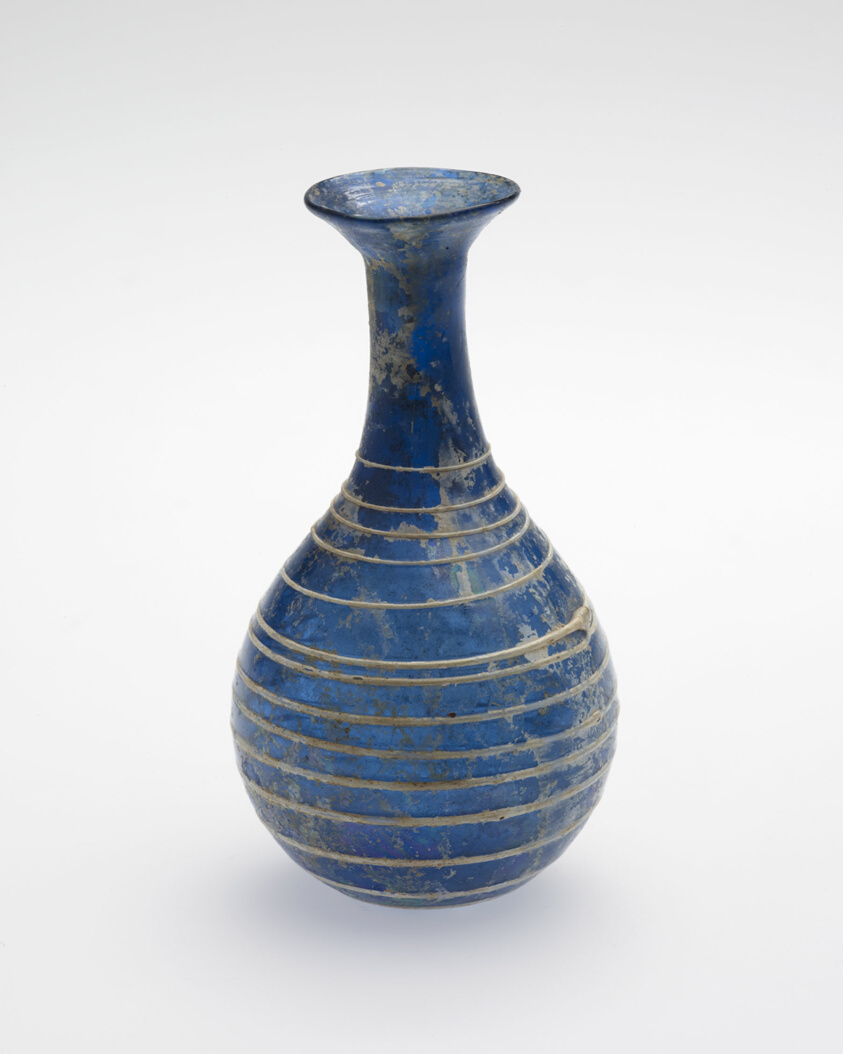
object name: Vessel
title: Bottle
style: roman (ancient, style or period), ancient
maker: Roman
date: Late 1st century BCE-early 1st century CE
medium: Glass, blown technique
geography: Mediterranean Region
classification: bottle; glass; vessel; ancient art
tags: containers